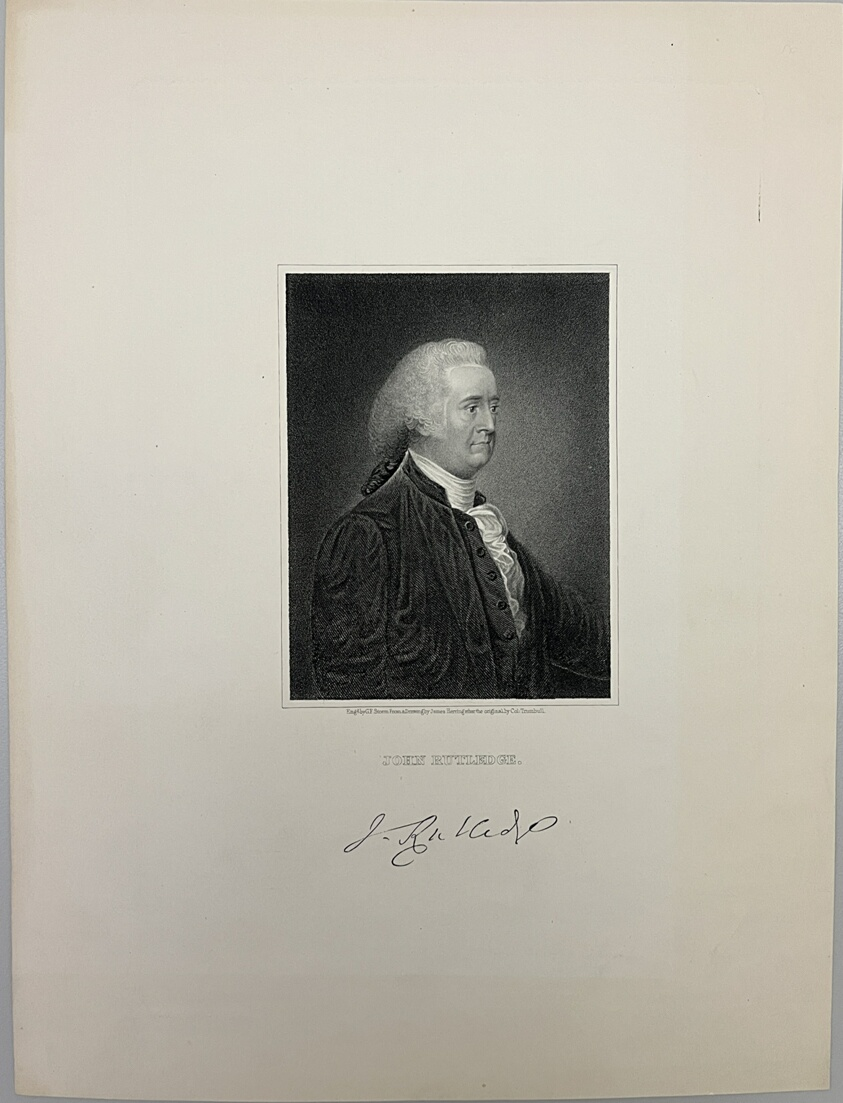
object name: Print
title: John Rutledge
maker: G.F. Storm (English, active in America, mid 19th century); after James Herring (American, 1794-1867); after John Trumbull (1756-1843)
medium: Lithograph on paper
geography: England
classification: reproduction; print; prints and drawing